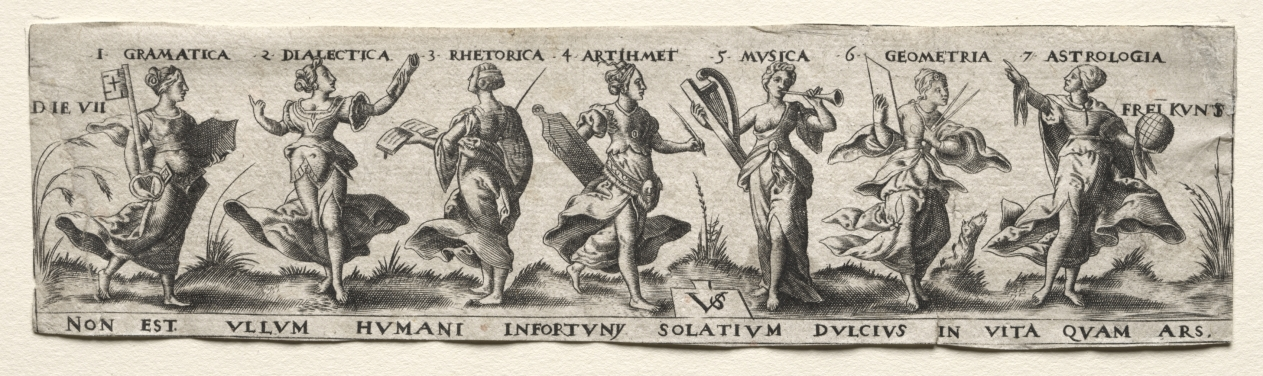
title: Seven Liberal Arts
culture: Germany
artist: Virgil Solis (German, 1514–1562)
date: 1530–62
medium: engraving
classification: Print